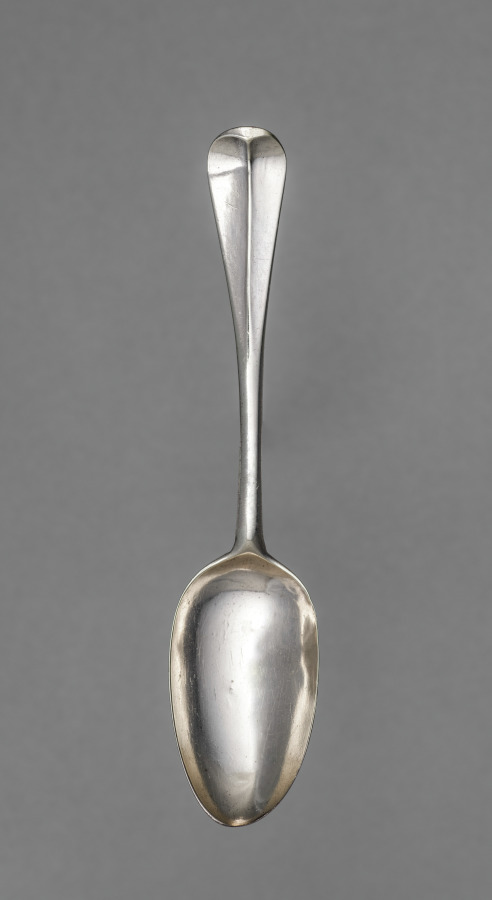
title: Tablespoon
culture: America, Massachusetts, Boston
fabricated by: William Homes (American, 1717–1783)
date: 1757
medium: silver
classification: Silver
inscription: engraved: E=P in shaded block letters over 1757 on back of handle end.